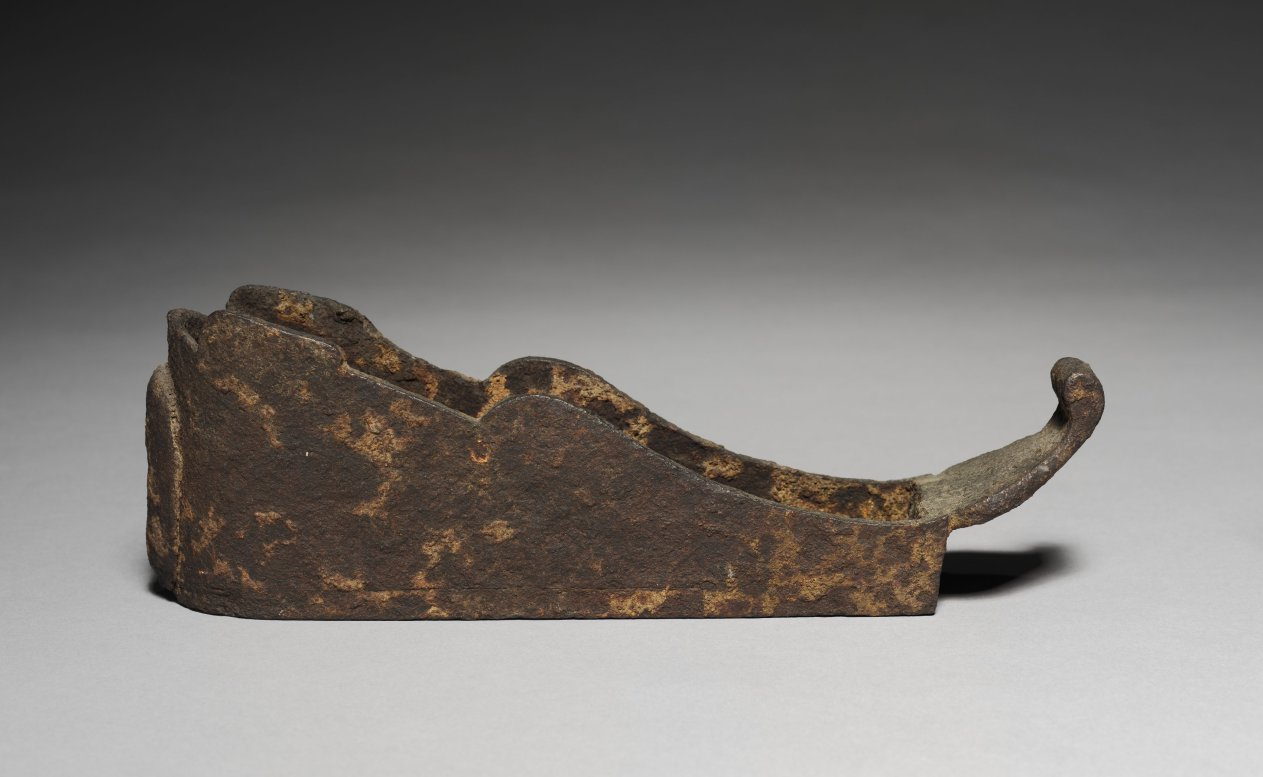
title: Carpenter's Plane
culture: Italy, 15th century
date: 1400s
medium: wood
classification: Tool